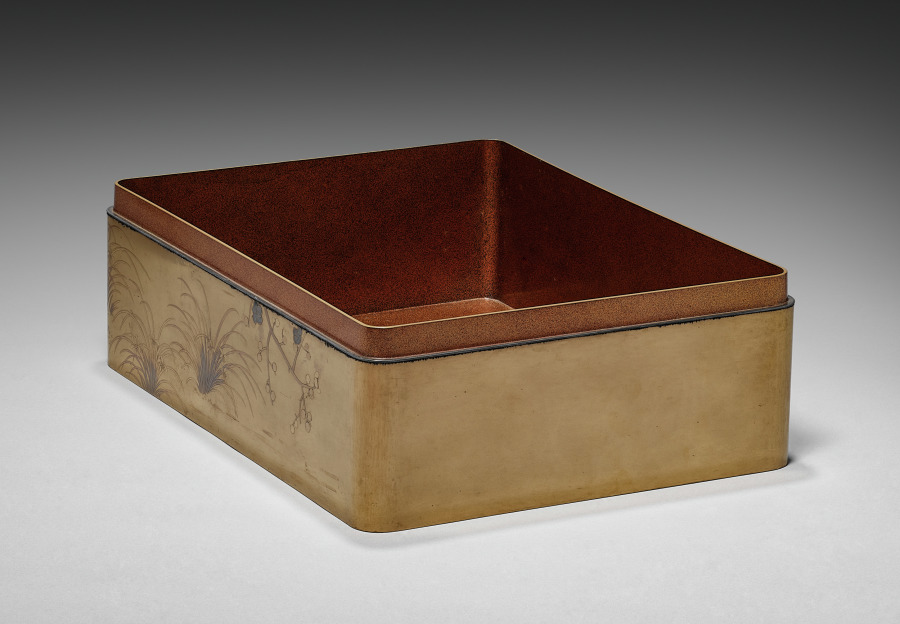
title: Document Box (Ryōshibako) with Chrysanthemum and Plum (base)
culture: Japan, Meiji period (1868–1912)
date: late 1800s-early 1900s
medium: gold lacquer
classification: Lacquer